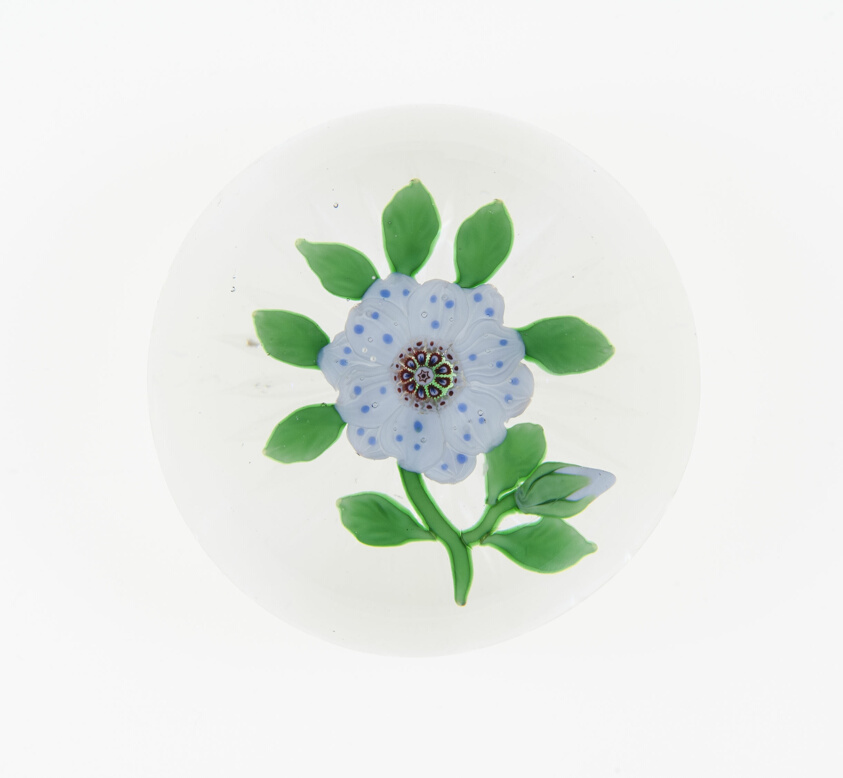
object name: Glass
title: Paperweight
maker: Baccarat Glassworks (Cristalleries de Baccarat); Lorraine, France, founded 1764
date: 19th century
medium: Glass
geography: Lunéville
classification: lampwork; paperweight; european decorative arts; glass